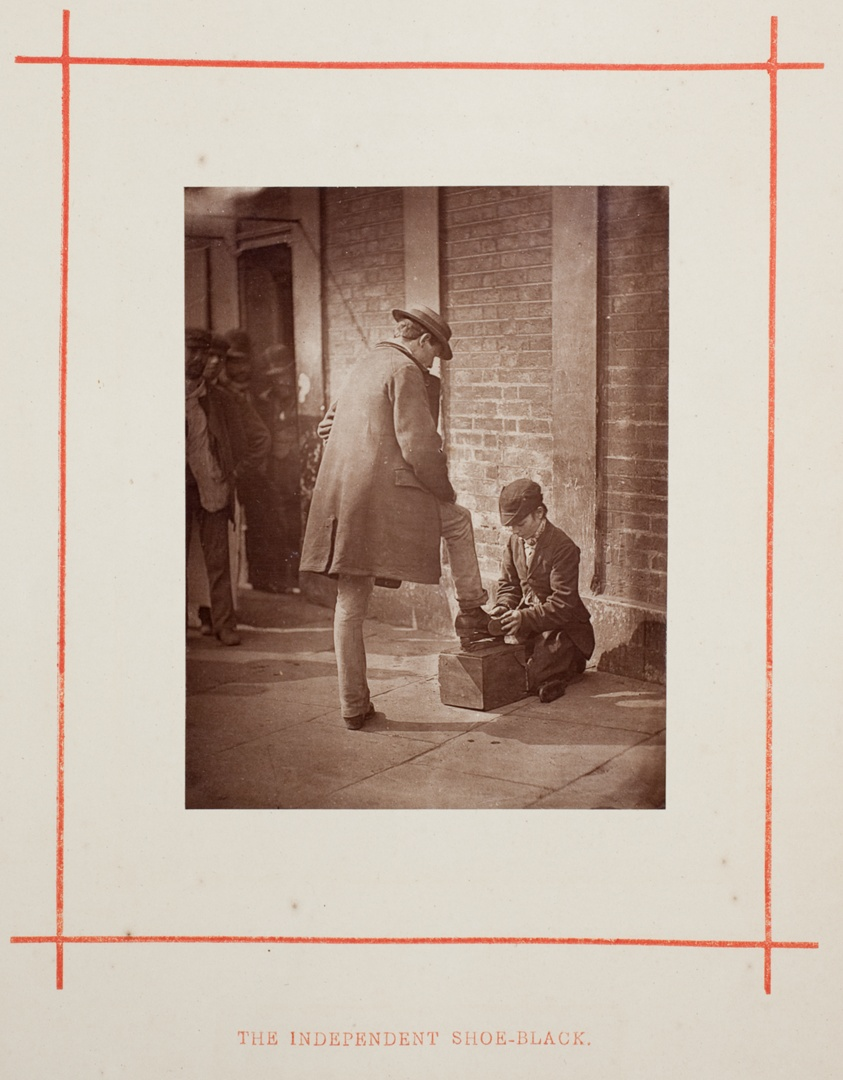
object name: Photograph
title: The Independent Shoe-Black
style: 19th century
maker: John Thomson (Scottish, 1837–1921)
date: 1877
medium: Woodburytype, from the album "Street Life in London"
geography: Scotland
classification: photograph; photography